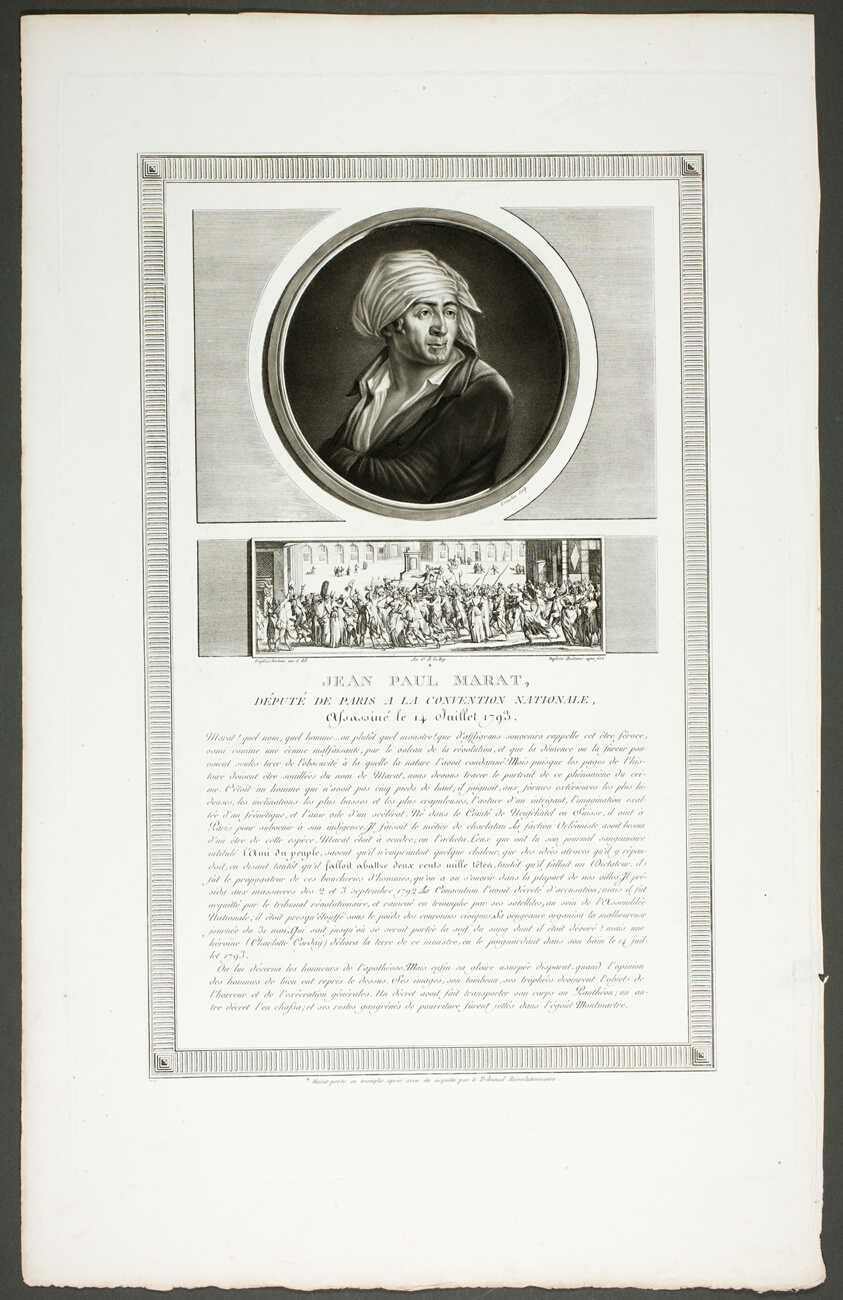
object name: Print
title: Jean Paul Marat, Paris Deputy to the National Convention, from the series Tableaux historiques de la révolution française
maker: Charles François Gabriel Levachez, and Son (French, 18th and 19th century); Jean Duplessi-Bertaux (French, 1747-1819)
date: 1798–1804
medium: Aquatint and etching, with engraving, on ivory wove paper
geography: France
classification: etching; print; prints and drawing